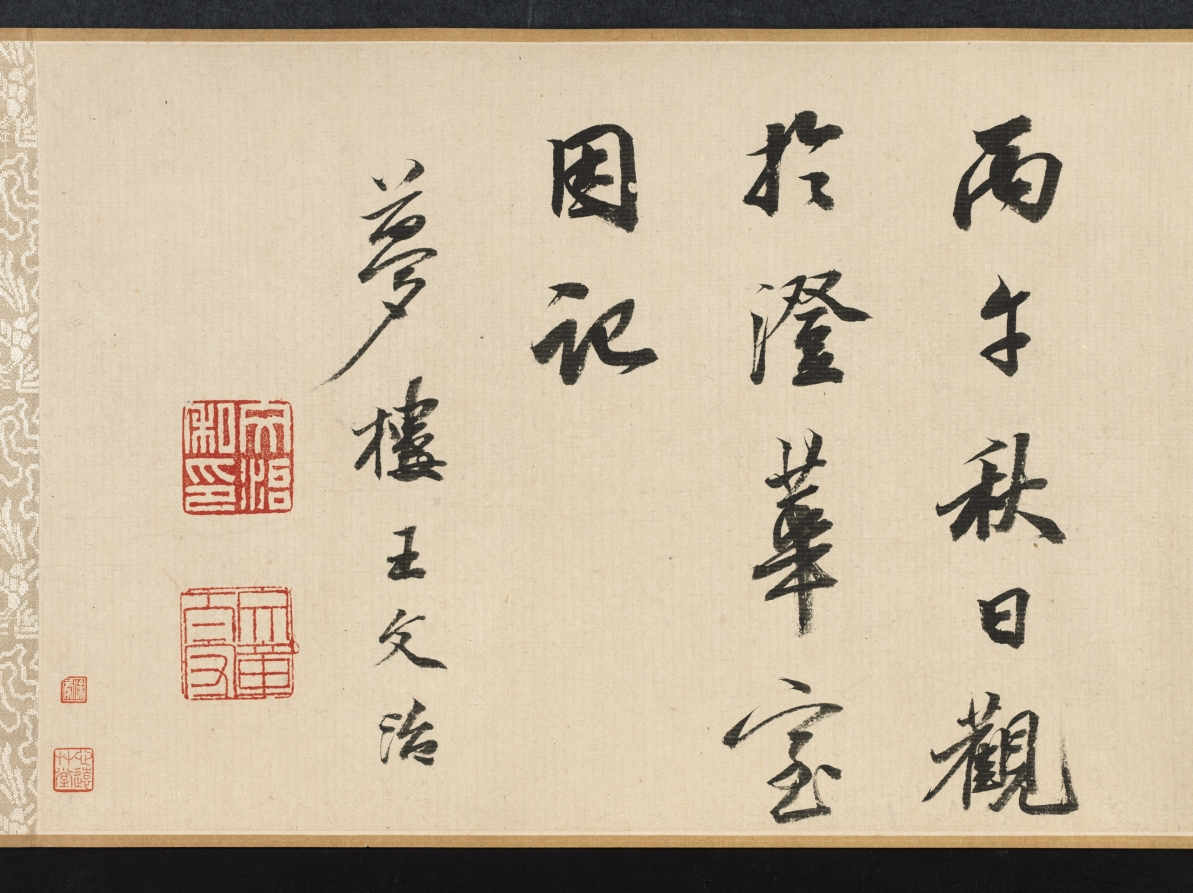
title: Chrysanthemums and Cabbage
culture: China, Ming dynasty (1368–1644)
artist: Tao Cheng (Chinese, active c. 1471–after 1502)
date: c. 1486 or before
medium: handscroll, ink and slight color on paper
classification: Painting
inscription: Artist's seal at beginning of painting: Yun hu 雲湖. Title by Wang Wenzhi 王文治 (1730–1802), date 1756. 2 seals of Wang Wenzhi 王文治 (1730-1802); 3 seals of Ku Yün (n. d.)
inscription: Section A (Chrysanthemums): 1 poem and 1 seal of Zhang Yuanzhen 張元禎 (1437–1507) - Jinshi, 1461; 1 poems and 3 seals of Ni Yue 倪岳 (1444–1501) - Jinshi, 1464; 1 poems and 2 seals of Zhao Xiang 趙祥 (life dates unknown) - Jinshi, 1469; 1 poems and 1 seals of Wu Xixian 吳希賢 (1437–1489) - Jinshi, 1464; 1 poems and 1 seals of Lü Chang 呂㦂 (1449–1511) - Juren, 1471; 1 poems and 3 seals of Fu Han 傅瀚 (1435–1502) - Jinshi, 1464; 1 poems and 1 seals of Feng Jue 馮珏 (life dates unknown) - Jinshi, 1478.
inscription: Chrysanthemums section, poem 1, by Zhang Yuanzhen 張元禎 (1437–1507): Several bushes of chrysanthemums grow in front of the Five-Willow Cottage,/ The yellow ones are really yellow and the white ones white./ This affable and decent fellow, young in years and unsophisticated,/ Has snapped one of the branches to dip in ink. (The Five-Willows Cottage was the home of the poet Tao Qian 陶潛 (Tao Yuanming 陶淵明, AD 365-427).) Chrysanthemums section, poem 2, by Ni Yue 倪岳 (1444–1501): Where at the Eastern Fence can you grieve for the Soul of the Xiang River?/ A man of upright character is mourned within the traces of ink./ White jade with a slight flaw would be a grievance forever,/ Later men should understand why even the roots of the flowers are washed. (Eastern Fence refers again to the poet Tao Qian 陶潛, while the Soul of the Hsiang River refers to the poet Qu Yuan 屈原 (c. 340–278 BC).) Chrysanthemums section, poem 3, by Zhao Xiang 趙祥 (life dates unknown): A clump of chrysanthemum grows in front of the bamboo pavilion,/ The winds of many autumns have blown since we parted beyond the river./ Straining wine through the official's cap of Tao [Qian] to prolong autumn's pleasures,/ The mists and clouds of ten thousand miles belong to the intoxicated. Chrysanthemums section, poem 4, by Wu Xixian 吳希賢 (1437–1489): It is a different spring if mulberry is planted during the latter part of the year,/ The dust of the world originally did not drop on clothing./ Who spills out ink under the Eastern Fence/ And paints so freely this portrait of chrysanthemums for the venerable Sir Tao? Chrysanthemums section, poem 5, by Lü Chang 呂㦂 (1449–1511): This full tray of ink for painting [flowers] at the Eastern Fence;/ Their whiteness or yellowness is not essential in capturing their beauty./ I don't have to go to Jiangnan to see them myself./ At my old house grow two or three branches. Chrysanthemums section, poem 6, by Fu Han 傅瀚 (1435–1502): Who daubed autumn flowers with ink/ As if they were dark dew on a branch tip only vaguely seen at evening?/ After the lazy clouds disperse, no one paints;/ A certain unconventionality pervades this painting. Chrysanthemums section, poem 7, by Feng Jue 馮珏 (life dates unknown): To satisfy his hunger, [the chrysanthemums] have at times entered the poetry of Qu Yuan;/ Taking up the wine cup, it felt close to Tao Qian./ [With them I am like] a lonely root sustained by deep water/ Or an old man to whose hair the color of youth returns.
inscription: Section B (Cabbage): 1 poem and 1 seal of Cai Qi 蔡圻 (life dates unknown) - degree information not known; 1 poems and 3 seals of Ni Yue 倪岳 (1444–1501) - Jinshi, 1464; 1 poem and 3 seals of Jiao Fang 焦芳 (1436–1517) - Jinshi, 1464; 1 poem and 3 seals of Li Dongyang 李東陽 (1447–1516) - Jinshi, 1464; 1 poems and 1 seals of Wu Xixian, signed “Xixian” 吳希賢 - Jinshi, 1464; 1 poems and 3 seals of Fu Han 傅瀚 (1435–1502) - Jinshi, 1464; 1 poems and 1 seals of Lü Chang 呂㦂 (1449–1511) - Juren, 1471; 1 poems and 2 seals of Zhao Xiang 趙祥 (life dates unknown) - Jinshi, 1469; 1 poems and 1 seals of Feng Jue 馮珏 (life dates unknown) - Jinshi, 1478.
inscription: Cabbage section, poem 1, by Cai Qi 蔡圻 (life dates unknown): The ink splashes are fresh from a frosty brush dipped in pond water;/ I can visualize that time when Yunhu 雲湖 [Tao Cheng] first showed his talents./ I lament the places where I scribbled before,/ Who would open them to inscribe a poem? (The first line is an allusion to the famous Jin dynasty calligrapher Wang Xizhi 王羲之 (AD 303-361), who practiced calligraphy so diligently at the edge of a pond that the water turned black with ink.) Cabbage section, poem 2, by Ni Yue 倪岳 (1444–1501): After rain the vegetables begin to grow;/ How are the colors of the masses lately!/ Once you get used to them, the tastiest parts are the ends of the roots;/ I don't know if they can be used for "seasoning soup." ("Seasoning soup" is an allusion to the statesmanship of a chief minister.) Cabbage section, poem 3, by Jiao Fang 焦芳 (1436–1517): This crop of purple stalks and green leaves is late and irregular;/ Now the rainy season is over for the Eastern Garden./ All the nobles nowadays dine on meat;/ Who of them knows the flavor of this [cabbage]. Cabbage section, poem 4, by Li Dongyang 李東陽 (1447–1516): It's always helped the honest man to sober up after drinks./ I intend to go to the deepest part of the stream-crossed garden/ To refresh myself in the fragrance and dew of evening. Cabbage section, poem 5, by Wu Xixian 吳希賢 (1437–1489): After rain, the white silk is filled with fragrant vegetables;/ How many times this happens in Mr. Tao's paintings./ On whom will you depend to present a memorial to the ruler?/ Don't let this color emerge on the faces of the people. (The last line is meant as a warning to officials: the color of the vegetables (green) may be pleasing in itself, but when it emerges on the faces of the starving poor, it signifies a badly governed world.) Cabbage section, poem 6, by Fu Han 傅瀚 (1435–1502): For twenty years I have feasted on the excellent mutton of an official;/ Yet I talk and dream about the garden and its vegetables./ Do not merely say it is good to chew the root of the cabbage--/ You must taste to understand what poverty is. Cabbage section, poem 7, by Lu Chang 呂㦂 (1449–1511): The capital is never a place for an apprentice in the "garden of scholarship."/ Who would write about gardens and vegetables on an examination paper?/ I've walked throughout the country in spring;/ Make sure the people don't show this color. Cabbage section, poem 8, by Zhao Xiang 趙祥 (life dates unknown): After a wash of rain, the spring garden is still in order;/ The flavor [of the cabbage] is more suitable with a small drink and the hum of a tune./ The rich and powerful in their mansions consume dish after dish of meat;/ Vegetarian food is known only by the scholars. Cabbage section, poem 9, by Feng Jue 馮珏 (life dates unknown): A new cabbage is nourished with dew;/ It takes a long time to grow and mature./ The business of "seasoning the soup" is your responsibility;/ Better command the gardener to take care [of the cabbages]. trans. HK/LYSL/WKH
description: On an autumn day in Beijing, Tao Cheng had a gathering with a group of scholar-officials and created two paintings in a spontaneous, casual style. The first depicts chrysanthemums, slender bamboo stalks, and a rock in monochrome ink. Tao applied light colors for the second painting that depicts cabbage. Tao deliberately placed the images on the first sections of the paper so that his honorable guests could add their poetic inscriptions inspired by his imagery. In the first section to the right, all seven poetic inscriptions refer to the beloved poet and recluse Tao Qian (also called Tao Yuanming, AD 365–427) who was particularly known for his profound love for chrysanthemum flowers. Most of the inscriptions in the second section express sympathy for the poor, since cabbage is the main ingredient in their humble food. Taken together, the poems and paintings allude to the life and responsibilities of the scholar-official: the importance of both an upright character and a concern for the poor citizens in order to achieve good government.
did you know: Eminent calligrapher Wang Wenzhi 王文治 was only 27 sui when he wrote the title in 1756.